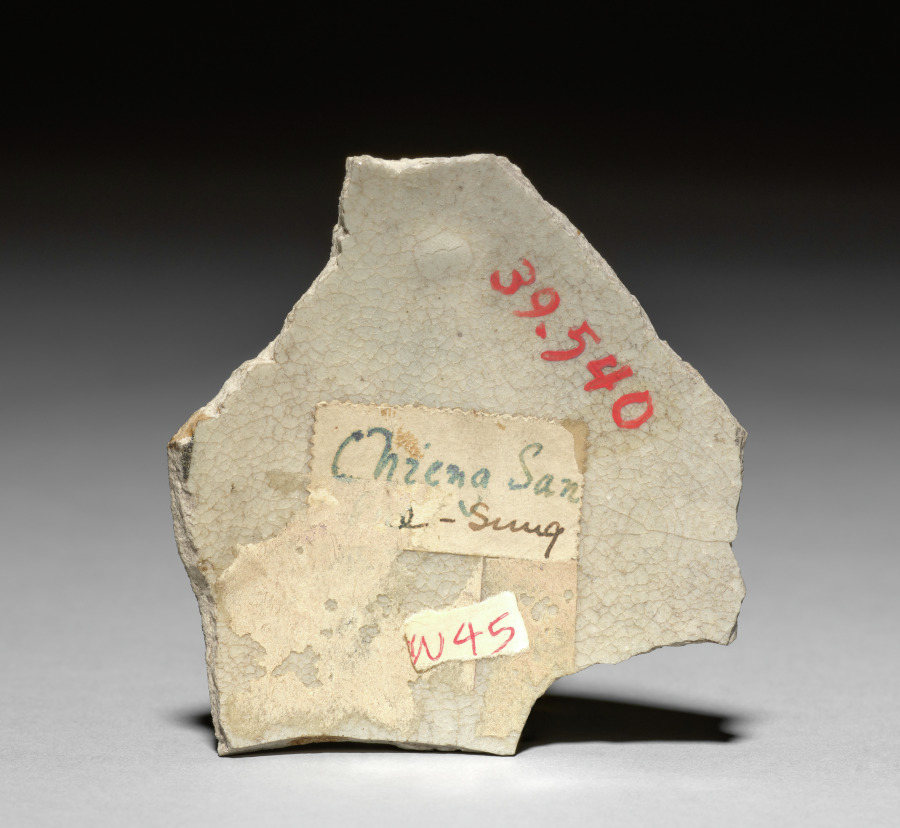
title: Pottery Fragment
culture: Siam, Sawankhalok ware, 15th century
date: 1400s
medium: stoneware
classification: Ceramic